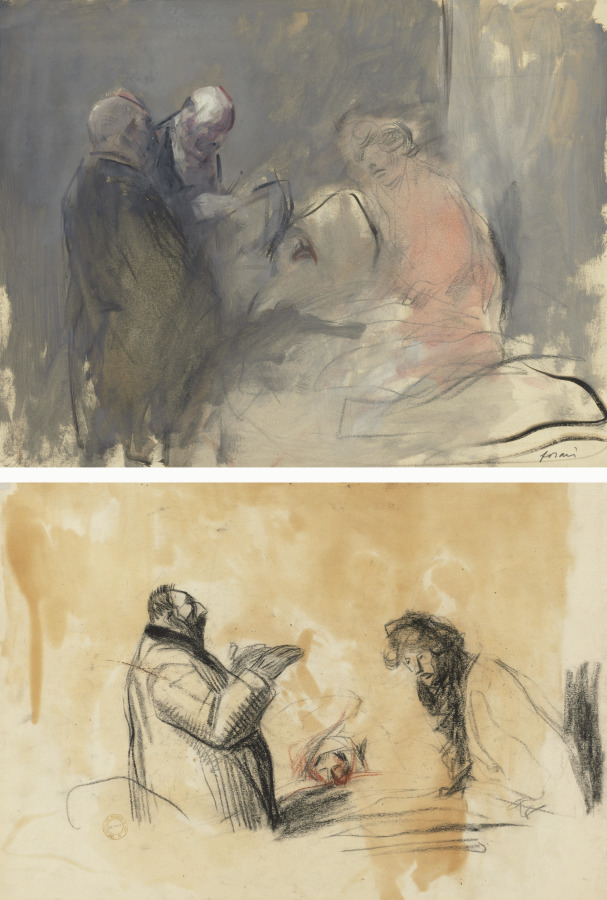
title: In the Hospital (recto) Sketch for In the Hospital (verso)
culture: France, late 19th-early 20th Century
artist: Jean Louis Forain (French, 1852–1931)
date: fourth quarter 1800s or first third 1900s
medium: watercolor and gouache over black crayon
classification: Drawing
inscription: signed, lower right, in graphite: forain ; lower left, in graphite: 61 ; lower right, in graphite: A 2334